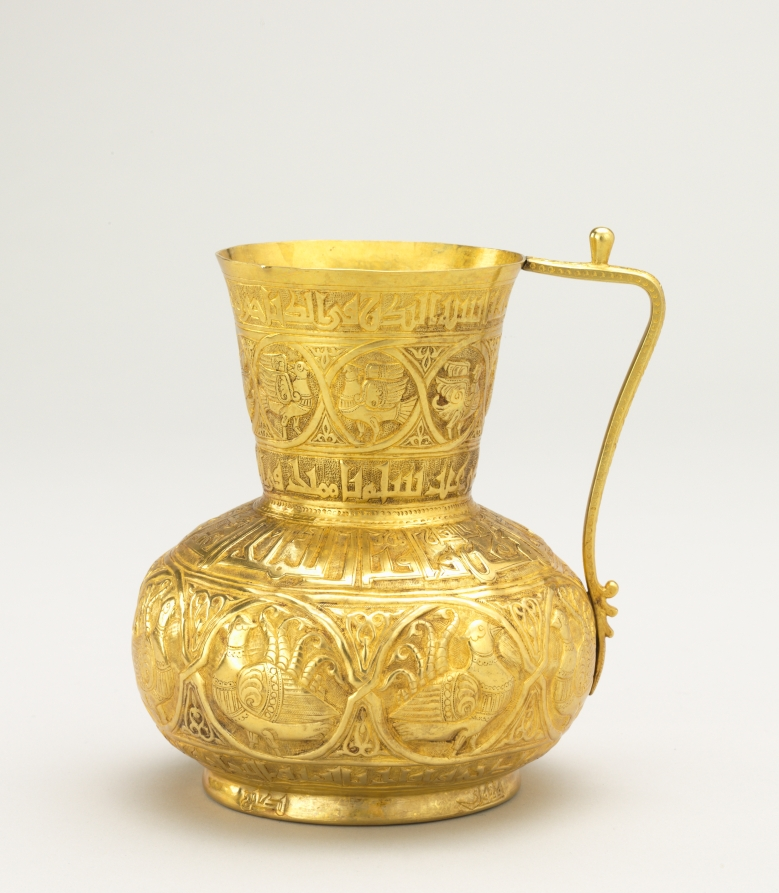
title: Jug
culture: Iran or Iraq, Baghdad, Buyid Period, reign of Samsam al-Dawla (985-998 AD)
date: late 900s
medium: gold with repoussé and chased and engraved decoration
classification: Metalwork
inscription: The inscription bands contain Arabic poetry which translates, in part: "You are the image of the full moon at night, the first gleam of sun on the horizon of the morning. You are a sword in the times of war, a beneficent rain in times of peace...your sword cuts the necks of Buyid enemies in great quantities...Glory and prosperity to the just king Samsam al-Dawla...May God lengthen your reign!"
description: This jug is one of the rare surviving Islamic vessels made entirely of precious metal. Its inscription bands contain Arabic poetry that translates, in part: "You are the image of the full moon at night, the first gleam of sun on the horizon of the morning. You are a sword in the times of war, a beneficent rain in times of peace . . . your sword cuts the necks of Buyid enemies in great quantities . . . Glory and prosperity to the just king Samsam al-Dawla . . . May God lengthen your reign!"